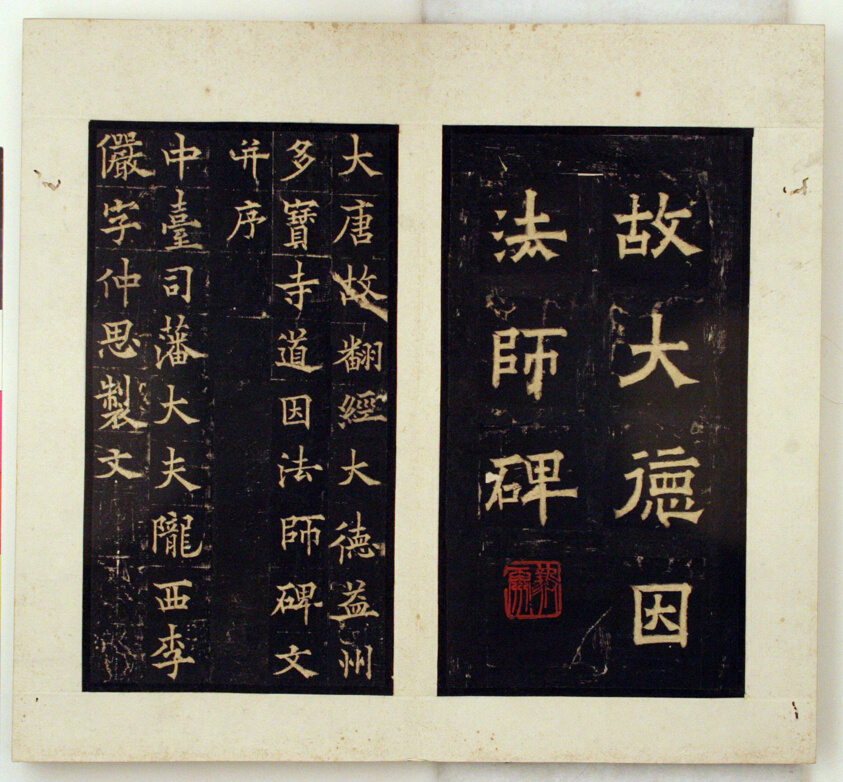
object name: Painting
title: Memorial Stele for the Buddhist Master Daoyin (Ink Rubbings)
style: Chinese (culture or style)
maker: Artist unknown; Chinese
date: Qing dynasty (1644–1911); Jiaqing–Daoguang reigns, c. 1796–1850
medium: Album of rubbings, ink on paper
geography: China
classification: calligraphy; asian art; book; ink; rubbing